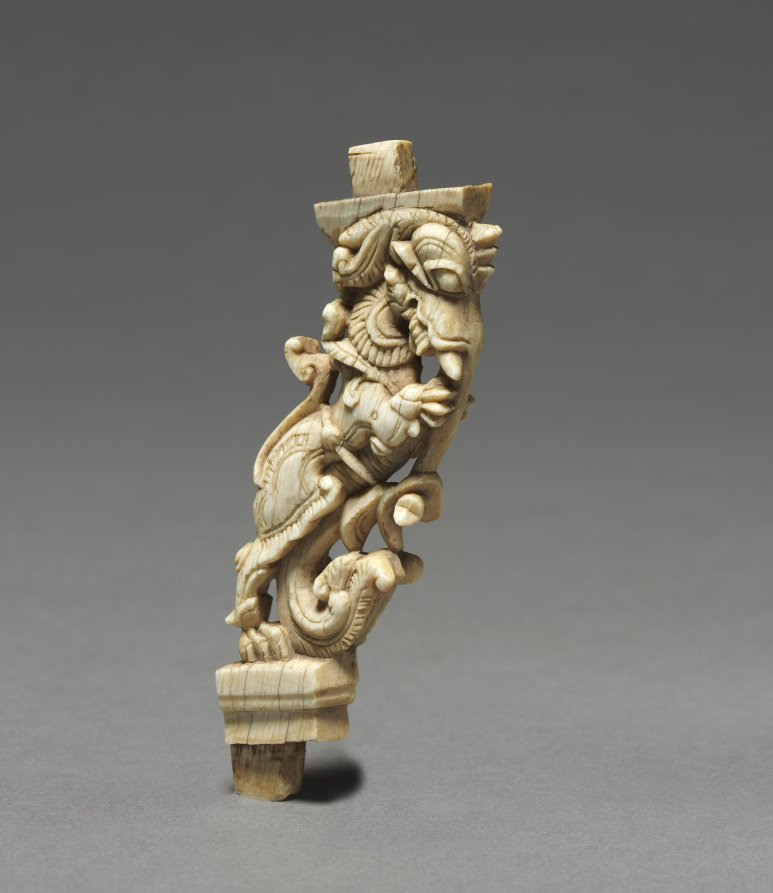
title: Carved Bracket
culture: South India, probably Madurai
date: 1600s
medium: Ivory with traces of pigment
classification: Ivory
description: Composite creatures with the body of a lion, tusks and trunk of an elephant, and horns of an antelope are standard elements of medieval Indian architecture and furniture. Traces of pigment indicate that this work was once brightly colored.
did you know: Ivory was most often harvested from a recently deceased elephant.